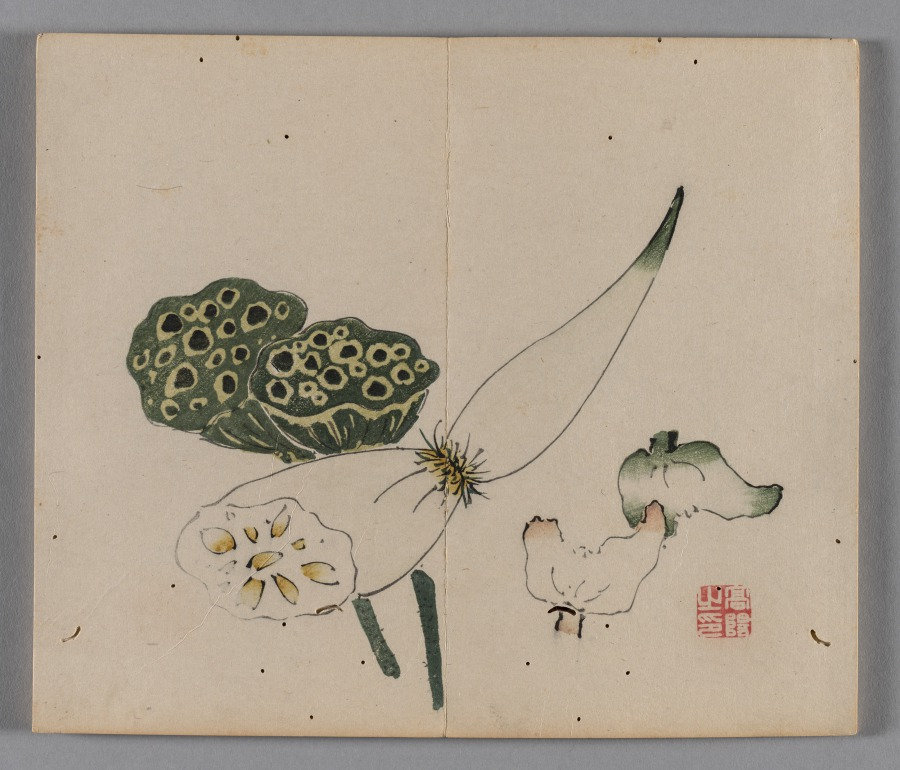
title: Ten Bamboo Studio Collection of Calligraphy and Painting: Miscellaneous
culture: China, Qing dynasty (1644-1911)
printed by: Hu Zhengyan (Chinese, c. 1584–1674)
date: 1633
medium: Woodblock-printed book; ink and colors on paper; first edition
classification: Print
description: Color printing reached a level of perfection in the early 1600s, as seen in this Ten Bamboo Studio Collection of Calligraphy and Painting and the Mustard Seed Garden Manual of Painting (printed 1679 and 1701). The painterly quality, precision in registering (aligning) the woodblocks, and harmonious colors made them the most successful color print editions in Chinese history. Both editions were printed and compiled in Nanjing, spread nationwide, and had a great impact on the arts in Japan and Korea.